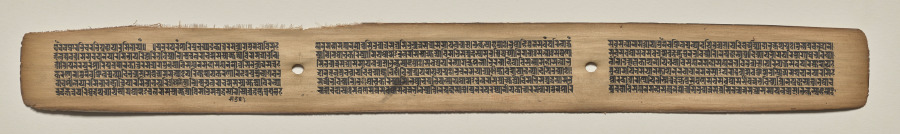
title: Text, Folio 127 (recto), from a Manuscript of the Perfection of Wisdom in Eight Thousand Lines (Ashtasahasrika Prajnaparamita-sutra)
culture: Eastern India, Bihar, Vikramashila Monastery. Painting: Nepal, Kathmandu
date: Sunday, September 14, 1119 (year 239 of the Newar Samvat in the month of Ashvina)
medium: gum tempera and ink on palm leaves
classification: Painting